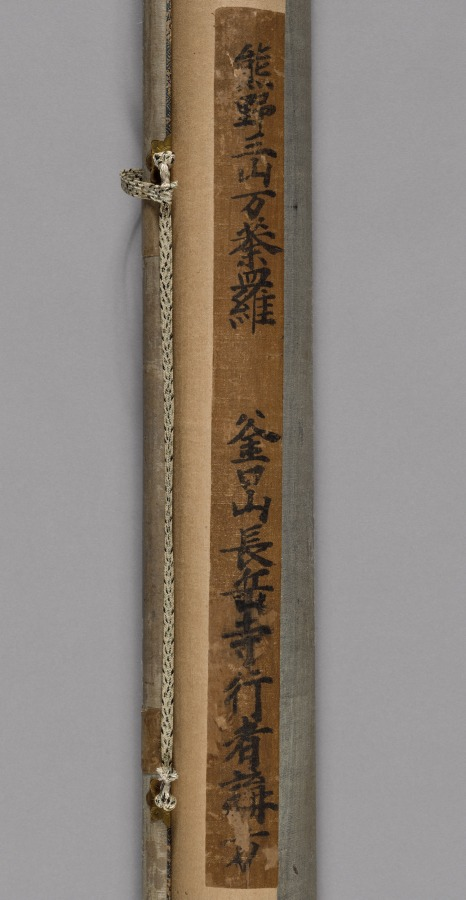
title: Mandala of the Three Shrines at Kumano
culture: Japan, Kamakura period (1185–1333) to Nanbokuchō period (1336–92)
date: 1300s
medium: hanging scroll; ink and color on silk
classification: Painting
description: This painting depicts the three shrines of Kumano from a bird’s-eye perspective, with the Buddhist counterparts of the kami of each shrine hall shown in discs directly above the halls. It also features figures, both pilgrims and deities, along the pilgrimage route and at the shrines. It is the only surviving work illustrating architectural representations of all three shrines in the same painting. They are compressed into a stacked composition, with the Nachi shrine at the top, the Shingū in the middle, and the Hongū at the bottom.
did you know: The sacred waterfall at the top right of the painting is called Nachi.